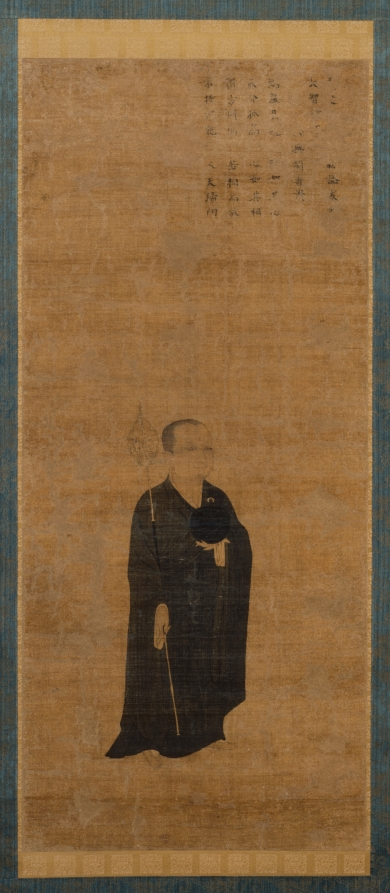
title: Portrait of Priest Dazhi (1048–1116), Master of Law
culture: China, Southern Song dynasty (1127-1279)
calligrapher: Liu Tao (Chinese, late 1000s–early 1100s)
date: 1100s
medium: Hanging scroll; ink and light color on silk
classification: Painting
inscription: Inscription by Liu Tao (late 1000s–early 1100s): Dignified with the perfection of the upasampada,/ His appearance is like his mind;/ Uncompromising and loftily aloof,/ His mind is like his appearance./ To say he is square, he proves to be round;/ He looks timid, yet his spirit is unbound./ Having no attachment, and holding no reins,/ Man and deities alike take refuge in him. (Translation by WKH, 1980)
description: Monk Yuanzhao, with the honorific title Dazhi Lüshi, Great Wisdom Master of Vinaya, is depicted here as an itinerant monk, holding his alms bowl in the left and staff in the right. In 1142, Emperor Gaozong had bestowed Yuanzhao with a posthumous title, mentioned in the inscription, which suggests that the portrait was made after the master’s death. A master of the Lü sect of Buddhism, with a calm benevolent smile on his face, Yuanzhao was active on Mount Tiantai and in Hangzhou. Later, Liu Tao, a southerner from Changxing, added the inscription. The eulogy reads: Dignified he is, perfect in his upasampada [ordination of a monk]. His appearance is like his mind. Uncompromising and aloof. His mind is like his appearance. To say he is square, he proves to be round. He looks timid, yet his spirit is unbound. Having no attachment, and holding no reins, men and deities alike take refuge in him. —translated by Wai-Kam Ho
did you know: A native of Hangzhou, the priest Dazhi was known for his eloquent exposition of Buddhist doctrines and for his success in winning many converts.